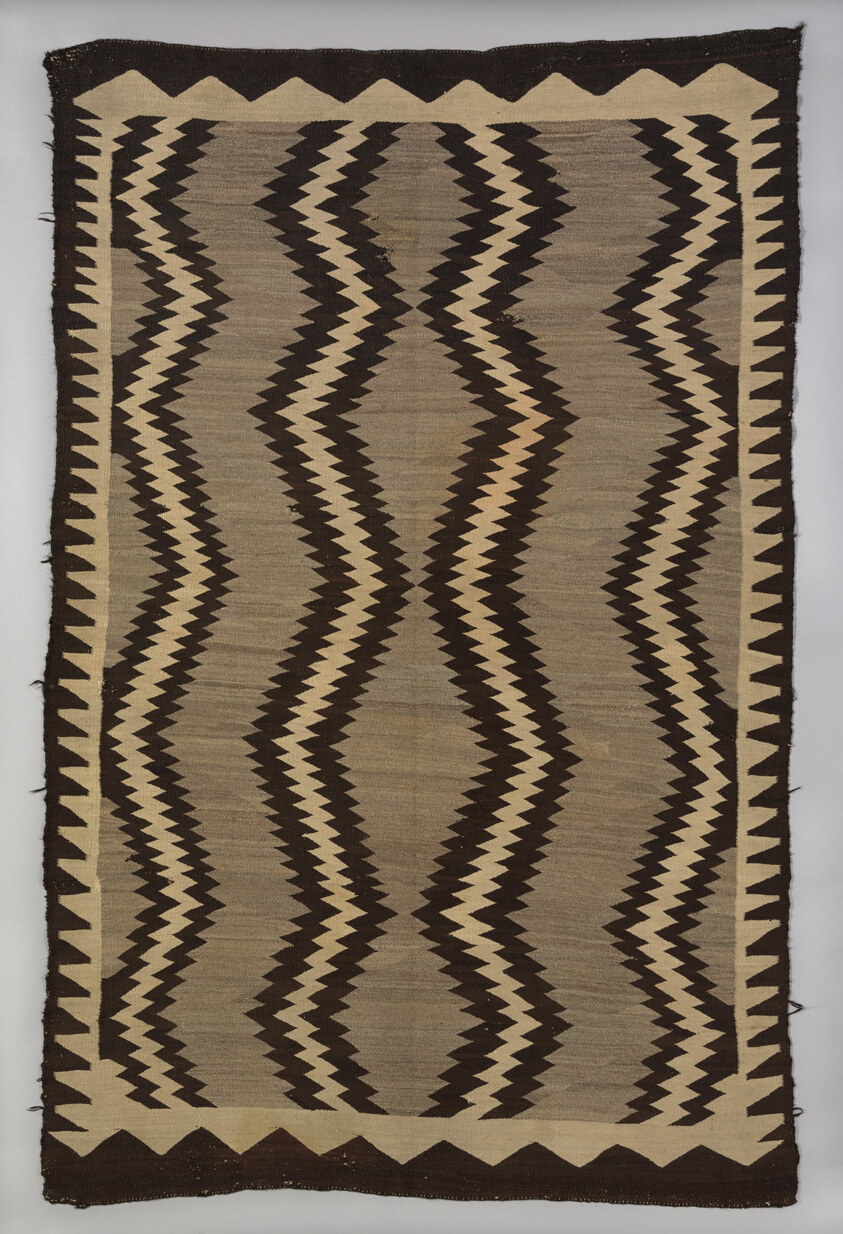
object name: Textile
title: Blanket or Rug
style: navajo, native american, americas, indigenous, north american, native north american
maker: Navajo (Diné) (Arizona, New Mexico, and Utah, United States)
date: Late 19th century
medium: Wool, dovetailed tapestry weave; twined edges; (remnants of) corner knotted tassel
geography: Navajo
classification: textile; weaving